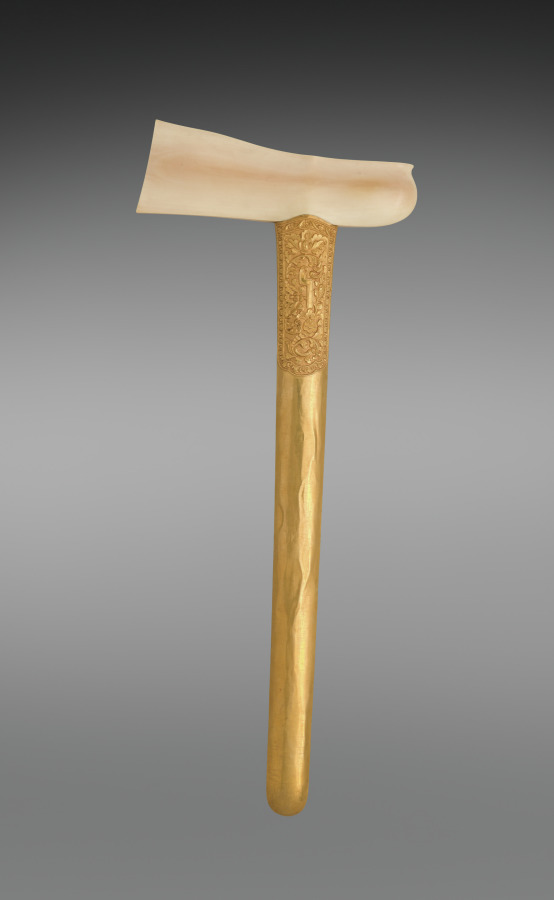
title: Scabbard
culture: Indonesia, Bali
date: 1800s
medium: metal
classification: Arms and Armor